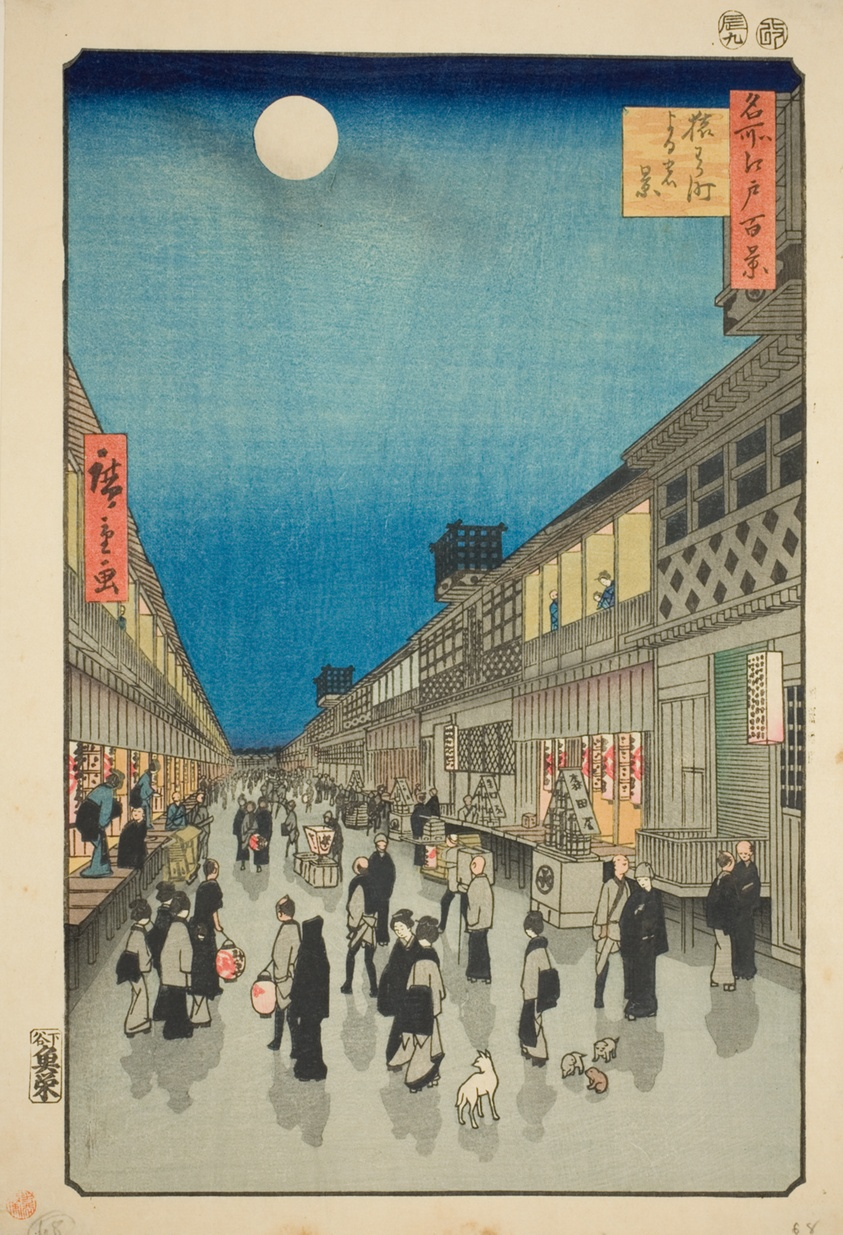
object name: Print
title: Night View of Saruwaka-machi (Saruwaka-machi yoru no kei), from the series "One Hundred Famous Views of Edo (Meisho Edo hyakkei)"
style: Japanese (culture or style)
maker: Utagawa Hiroshige 歌川 広重; Japanese, 1797-1858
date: 1856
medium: Color woodblock print; oban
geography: Japan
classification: woodblock print; print; asian art